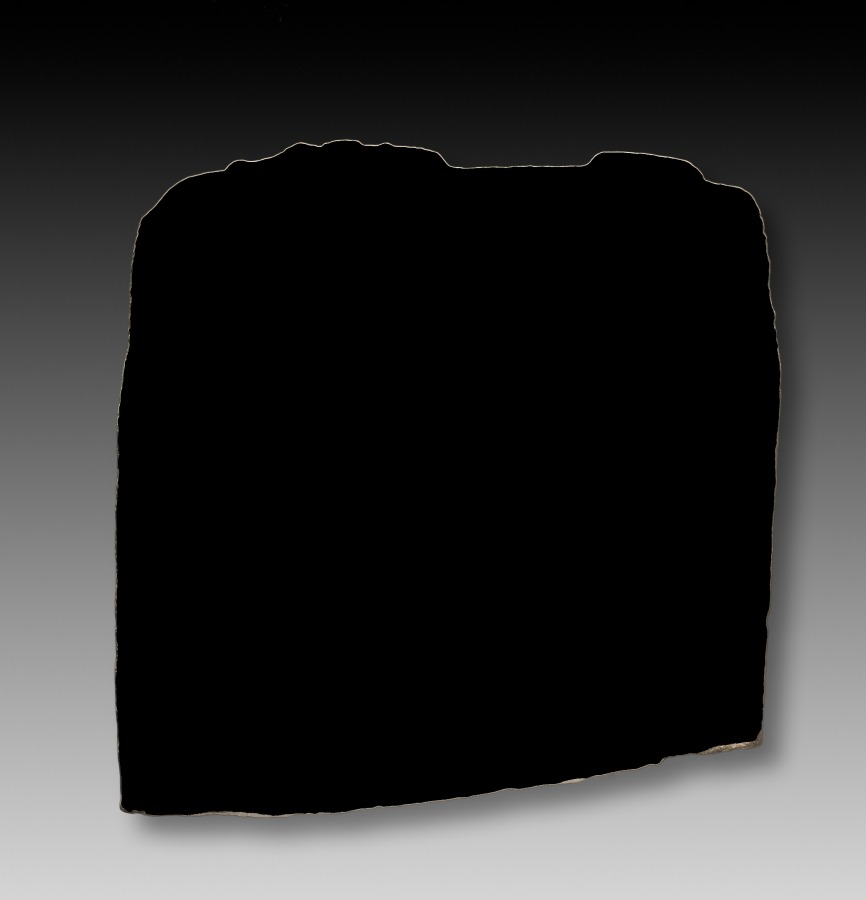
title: Stela Fragment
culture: Mexico, Veracruz?, 600-950 AD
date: 600–950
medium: limestone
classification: Sculpture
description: Figures appear on two sides of this fragmentary stela (upright stone slab carved in relief). One seems to represent a grimacing warrior who brandishes a club; arrow-like darts festoon his belt and hair. On the other side is a skeleton with one fleshed hand, perhaps a sacrificed captive. The eagle with a leaf in its mouth is a hieroglyph that may identify the captive's name.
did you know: The pointed teeth of the warrior are suggestive of dental modification, a practice known to have occurred from human remains.